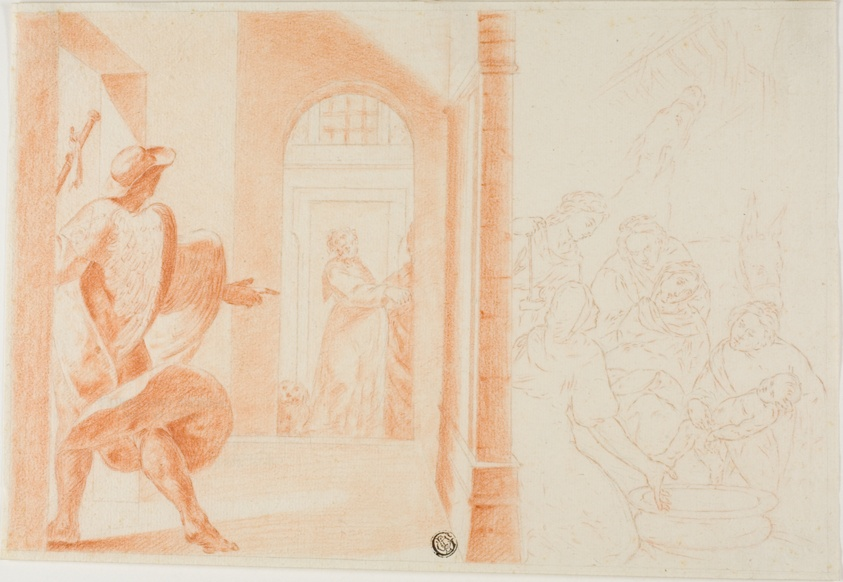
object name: Drawing and Watercolor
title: Nativity Scene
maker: Unknown Artist; Italian, 1600-1699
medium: Red chalk, with stumping, over black chalk, on ivory laid paper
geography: Italy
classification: chalk; drawings (visual works); prints and drawing